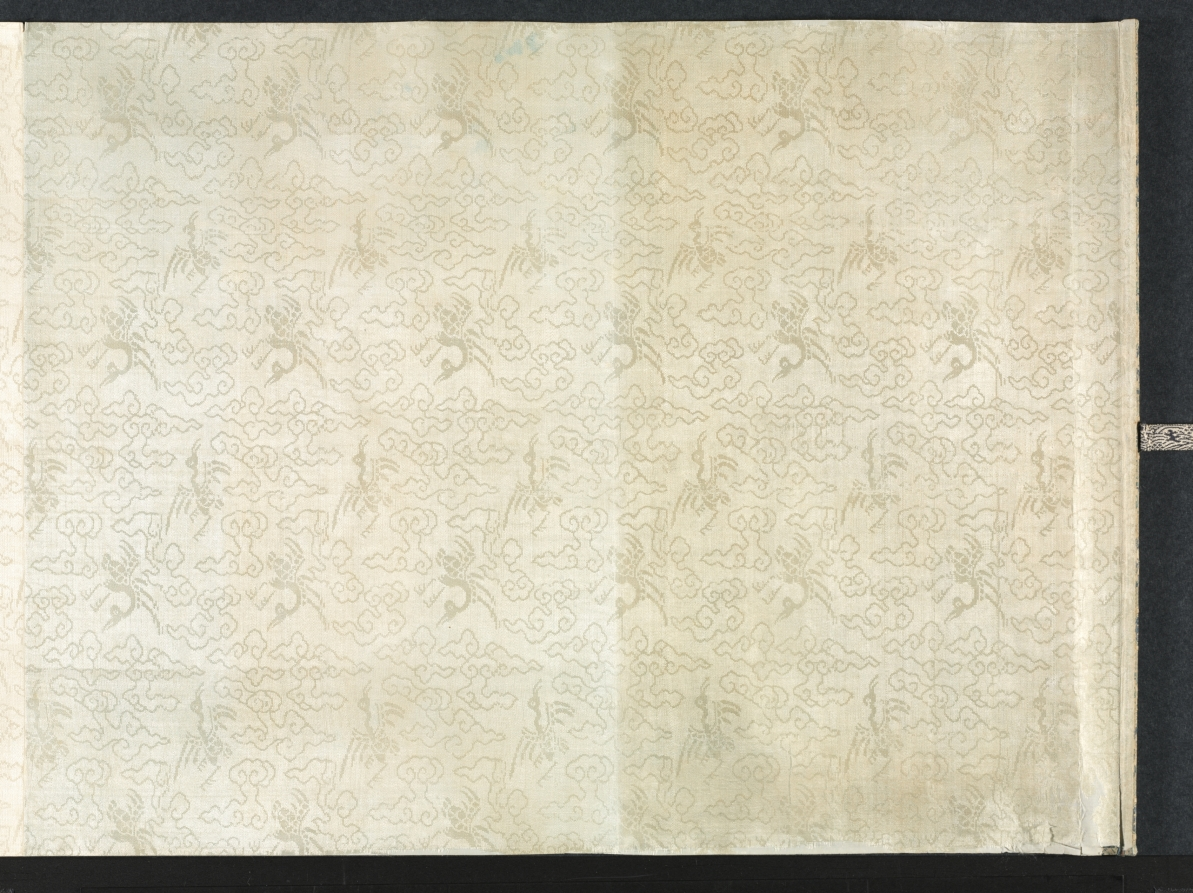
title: Hall of Lofty Pines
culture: China, Qing dynasty (1644-1911)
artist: Wang Hui (Chinese, 1632–1717)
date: 1703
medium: handscroll; ink and color on paper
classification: Painting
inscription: [題] 松喬堂圖 康熙癸未夏六月, 海虞耕煙散人王翬畫。[印]王翬之印; 石谷. [左下] 來青閣; 耕煙野老時年七十有二.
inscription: 松喬堂圖一卷，海虞石谷王君為靜海近公厲少司冦公作也。圖成于癸未之夏。未幾而公遂仙去。公令子今編修君南湖屬余題跋其後。余與公同官侍從，交契最深。側見公之清修純德，蔚為聖天子所眷重。侍直內廷，密勿贊襄，幾二十餘年。蒼生之所以受賜，士林之所以沐德者，天下莫能窺，在廷莫能悉。而公卒不言。以故宸衷日益契，恩禮亦日益渥。雖年逾懸車，時有歸老之念。而上固不聼公之去。其所謂松喬堂者，御書以賜公者也。蓋以松比公之清風勁節，而歲寒不改，經霜彌茂。則又以期公之壽考未有艾焉。公知此身未易乞，而山林槃磵之樂，止可寄諸寤思。此松喬堂圖之所由作也歟。石谷此圖，結構精密，筆墨超邁。其寫樹木之蒼蔚，堂宇之靚幽。恍見摩詰輞川樂天廬山之勝。獨惜公未得一日徜徉故園以償其願。即繪於圖亦未得以永其趣，此編修君之所以眷眷不忘也。雖然千歳之松喬，下蔭百畝，上以修棟梁之需。然則上當日名堂之意，不更望於後之人襲其芘而養其材也哉。吾願編修君之寶斯圖。并望君之塗塈丹雘，大其堂構也已矣。 康熈丙戍重陽三日，雲間王鴻緒跋。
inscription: 10 additional seals: 1 seal of Li Duna 勵杜納 (1628–1703); 4 seals of Zha Ying 查瑩 (jinshi of 1766); 5 seals of Li Yun (dates unknown).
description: Wang Hui 王翬, a leading painter in the orthodox school of the early Qing dynasty (1644–1911), was commissioned to paint this landscape with a country estate for Li Duna 勵杜納 (1628–1703), vice minister of justice in Emperor Kangxi’s court. The emperor had honored Li by granting him a piece of calligraphy with the name of Li’s retirement retreat, “Hall of Lofty Pines.” He drew a comparison between pines and Li’s upright character, resilience, and longevity. Wang Hui’s painting was supposed to allow Li to imagine living in a beautiful, secluded compound among the hills and pines. Sadly, Li died before seeing the completed painting and before receiving the emperor’s permission to retire. The landscape begins with peaceful riverbanks and low hills. The pines around the estate in the middle of the handscroll are truly lofty, some stretching even beyond the frame of the painting. Li Duna, the estate’s owner, is shown twice in his serene mountain retreat: first approaching the entrance to the compound with two servants at the right, and then later in the scroll, to the left, reading in the comfort of an inner room.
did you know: One servant carries the estate owner's carefully wrapped qin, a type of zither.